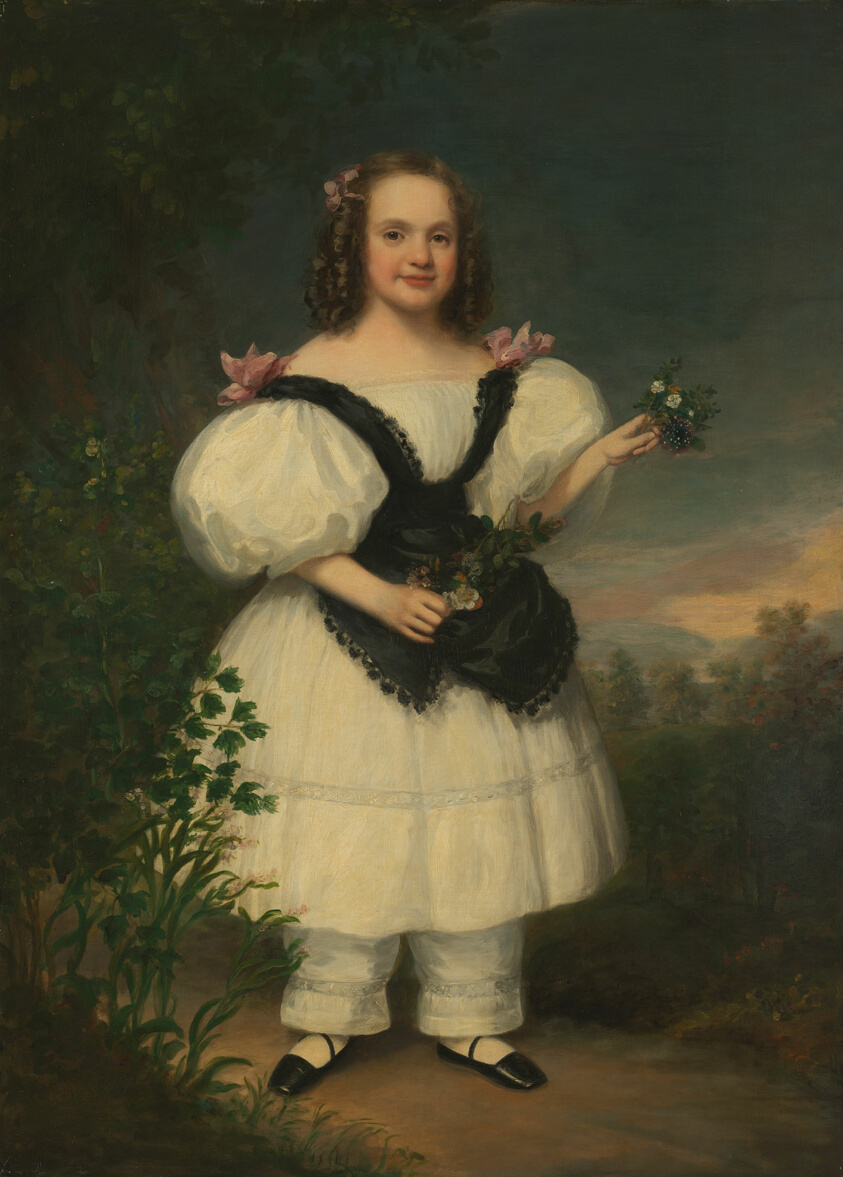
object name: Painting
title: Harriet White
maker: Samuel Lovett Waldo; American, 1783–1861; William Jewett; American, 1792–1874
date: 1835–40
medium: Oil on canvas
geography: United States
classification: painting; american arts